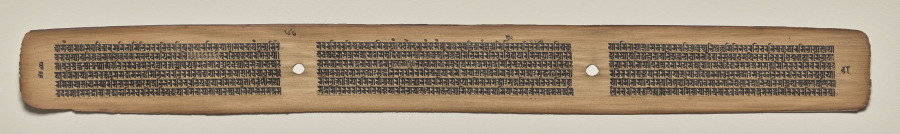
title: Text, Folio 68 (verso), from a Manuscript of the Perfection of Wisdom in Eight Thousand Lines (Ashtasahasrika Prajnaparamita-sutra)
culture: Eastern India, Bihar, Vikramashila Monastery. Painting: Nepal, Kathmandu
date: Sunday, September 14, 1119 (year 239 of the Newar Samvat in the month of Ashvina)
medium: gum tempera and ink on palm leaves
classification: Painting